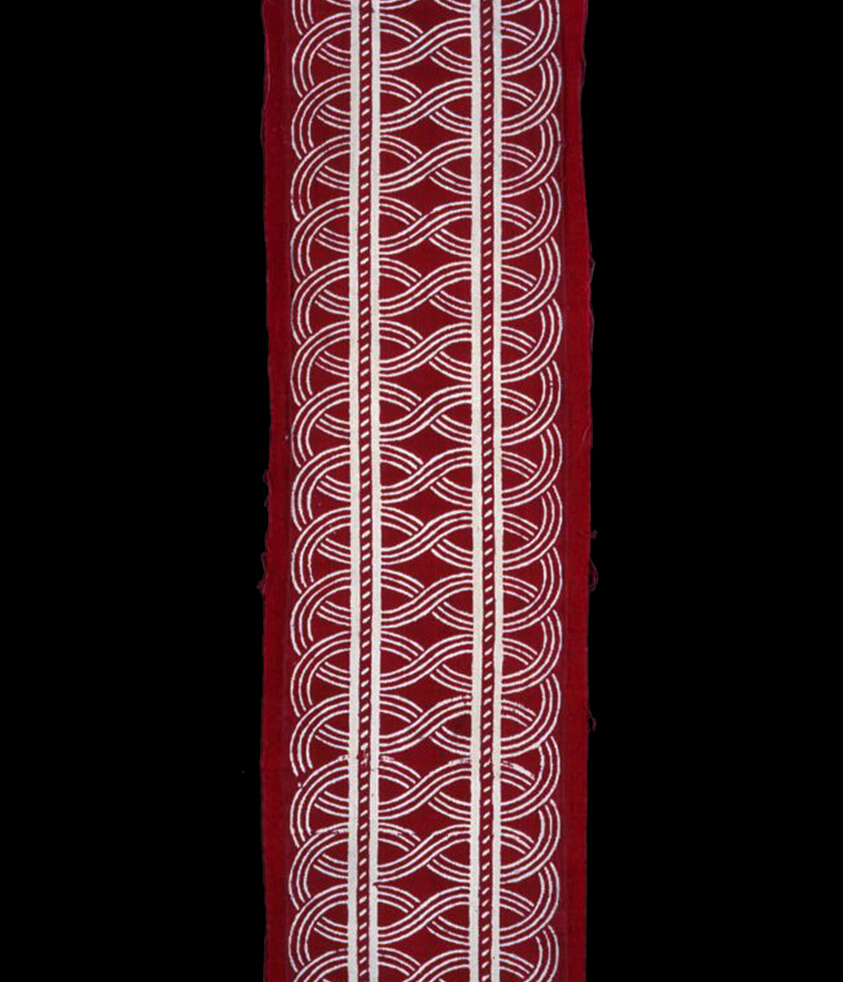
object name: Textile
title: Border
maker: England or United States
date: 19th century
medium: Cotton, plain weave, block printed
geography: England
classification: textile; weaving - printed